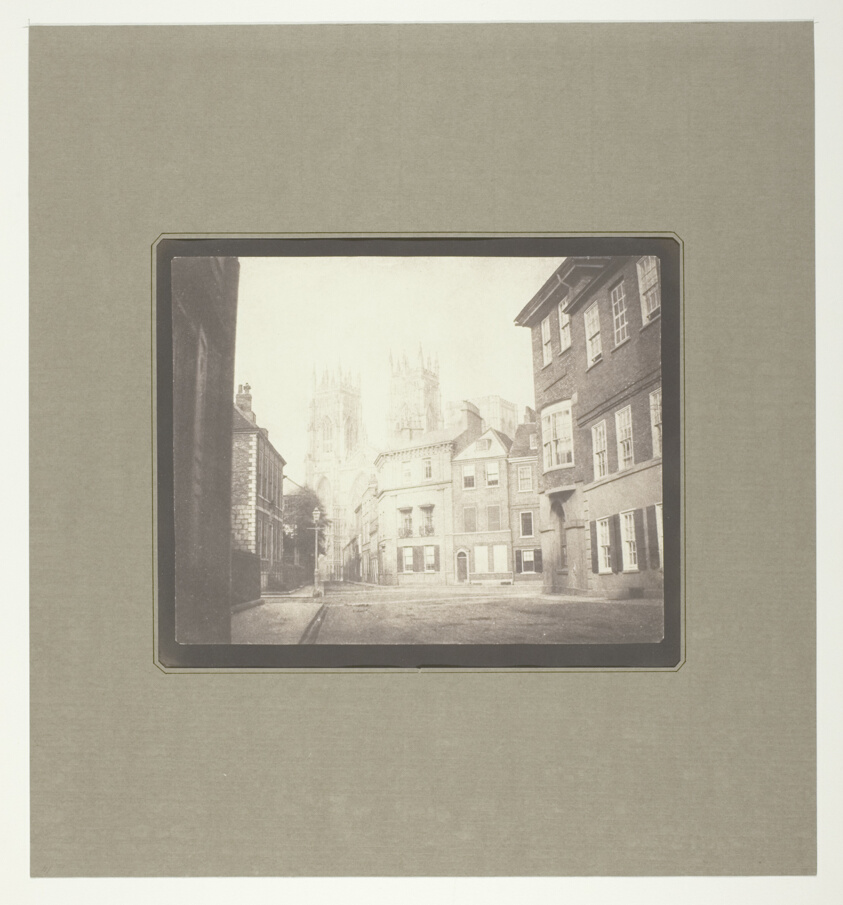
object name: Photograph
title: "A Scene in York" - York Minster from Lop Lane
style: 19th century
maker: William Henry Fox Talbot (English, 1800–1877)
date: July 28, 1845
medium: Salted paper print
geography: England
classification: salted paper print; photographic process; photography; photograph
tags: Collected by Hugh Edwards, cityscapes